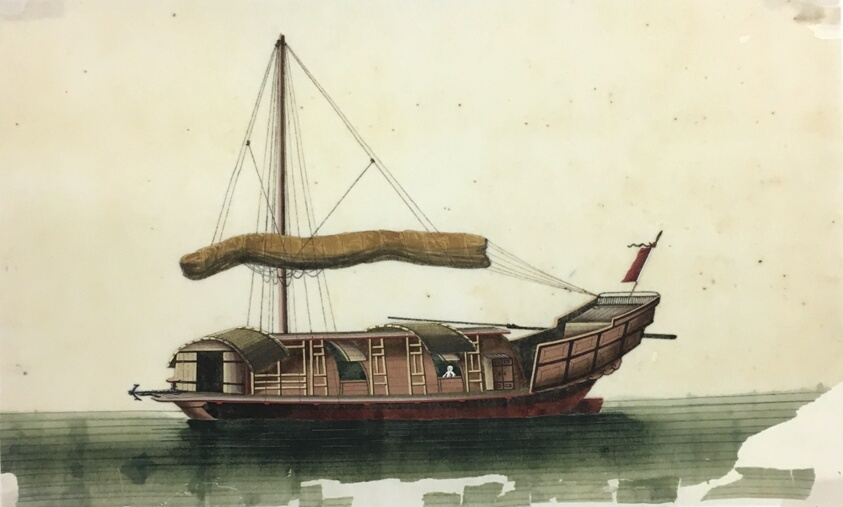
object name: Painting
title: Ship paintings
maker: China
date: mid 19th century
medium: Album of ten leaves; watercolor on paper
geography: Guangdong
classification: painting; asian art